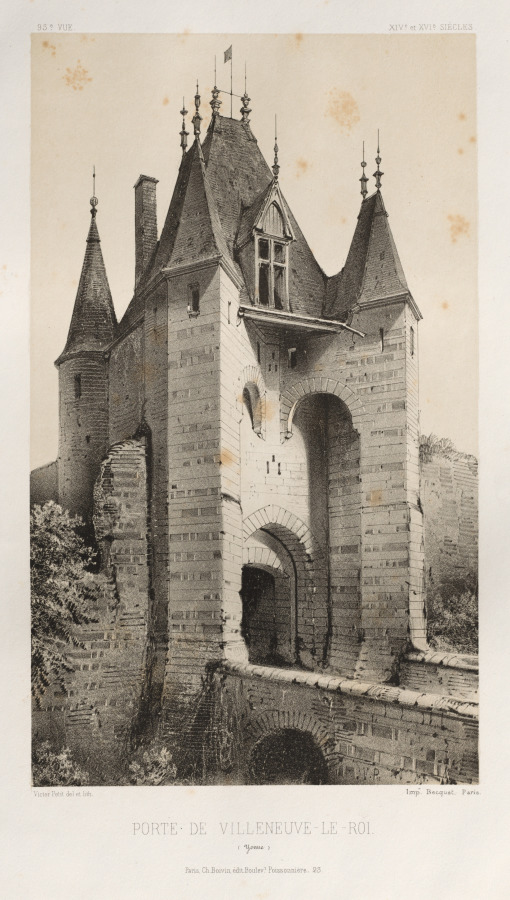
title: Architecture Pittoresque ou Monuments des XVeme. Et XVIeme. Siecles: Chateaux de France des XV et XVI Siecles: Pl. 95, Porte de Villeneuve-Le-Roi (Yonne)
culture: France, 19th century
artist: Victor Petit (French, 1817–1874)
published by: Charles Boivin (publisher and editor); Lith de Godard a Paris (printer)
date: 1860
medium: lithograph with tint stone, from portfolio of 100 lithographs with tint stone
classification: Print